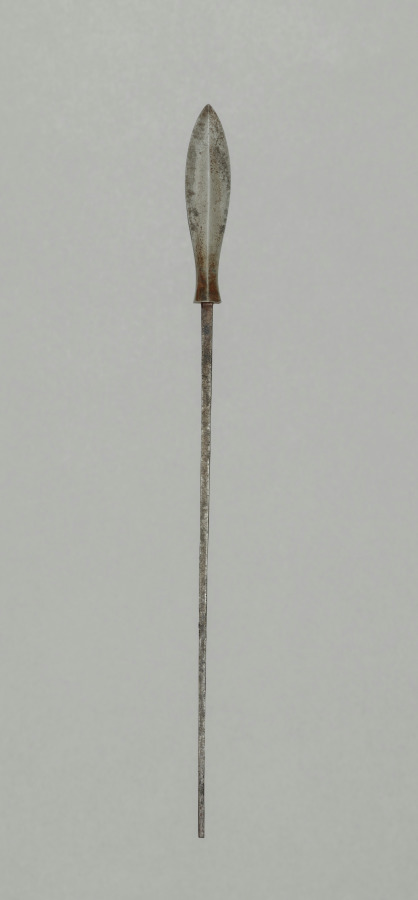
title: Arrow Point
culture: Japan, Edo period (1615–1868)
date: 1700s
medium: steel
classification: Arms and Armor